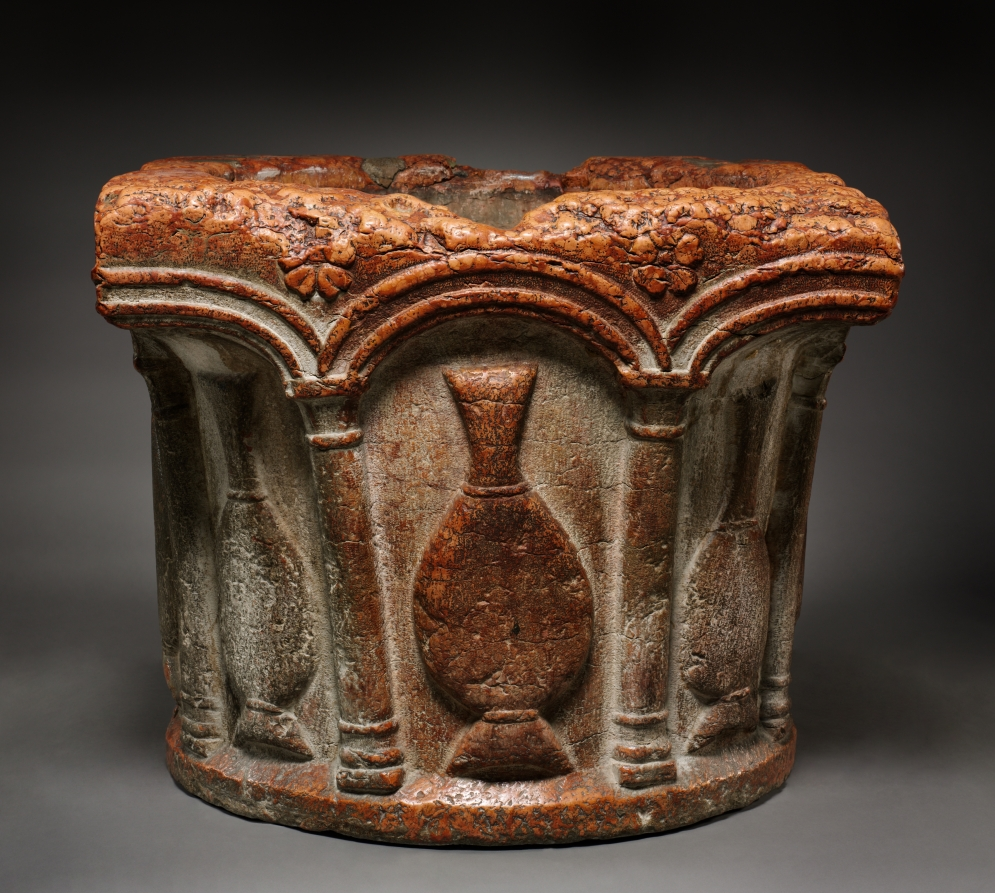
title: Well Head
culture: Italy, probably Verona, 15th century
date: 1400s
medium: pink limestone (called "Verona Marble")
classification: Sculpture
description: A well head is an architectural element that protects the mouth of a well. This example is both decorative and functional. The durable pink limestone well head facilitated access to the water whose restorative nature is echoed in the flowers and vases that ornament its surface.